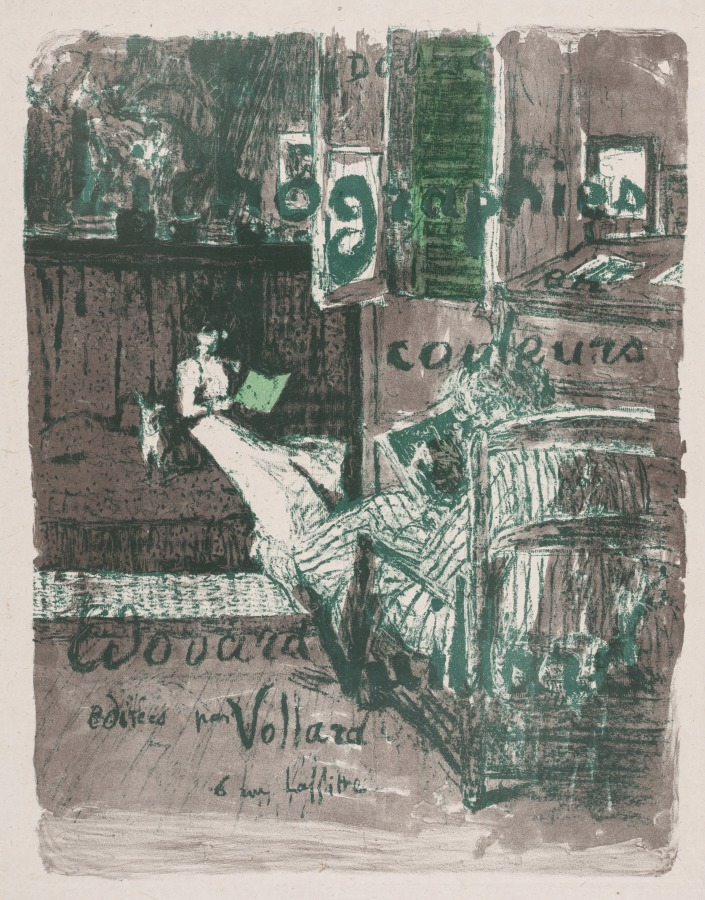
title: Landscapes and Interiors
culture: France, 19th century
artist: Édouard Vuillard (French, 1868–1940)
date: 1899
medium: lithograph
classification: Print